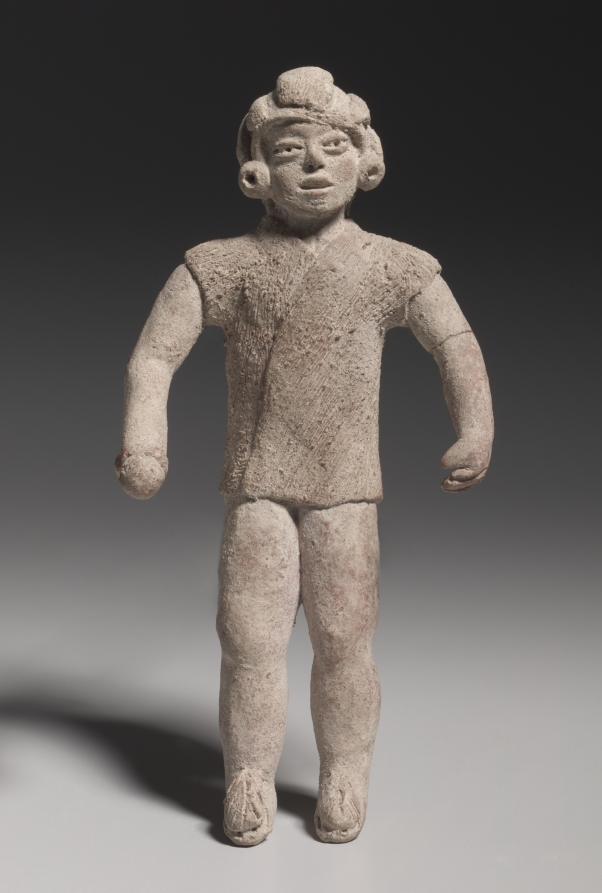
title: Figurine Holding A Ball(?)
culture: Mexico, Guerrero, Xochipala style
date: 1500–500 BCE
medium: earthenware, pigment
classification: Ceramic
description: Ballgame ceremonialism and art peaked between AD 600 and 1100 in Veracruz and elsewhere, but forms of a ballgame were played at most times and places in Mesoamerica. This charming figurine, which seems to hold a ball, illustrates that the game developed much earlier, although we know little about its meaning during this period.